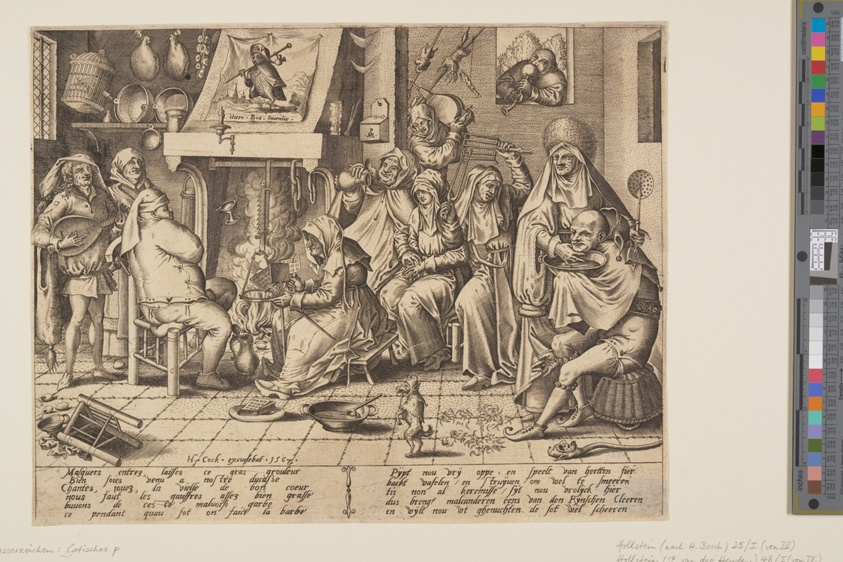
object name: Print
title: Shrove Tuesday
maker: Pieter van der Heyden (Flemish, c. 1530–after 1572); after Hieronymus Bosch (Netherlandish, c. 1450–1516)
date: 1567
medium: Engraving on ivory laid paper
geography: Flanders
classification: print; paper; prints and drawing; engraving